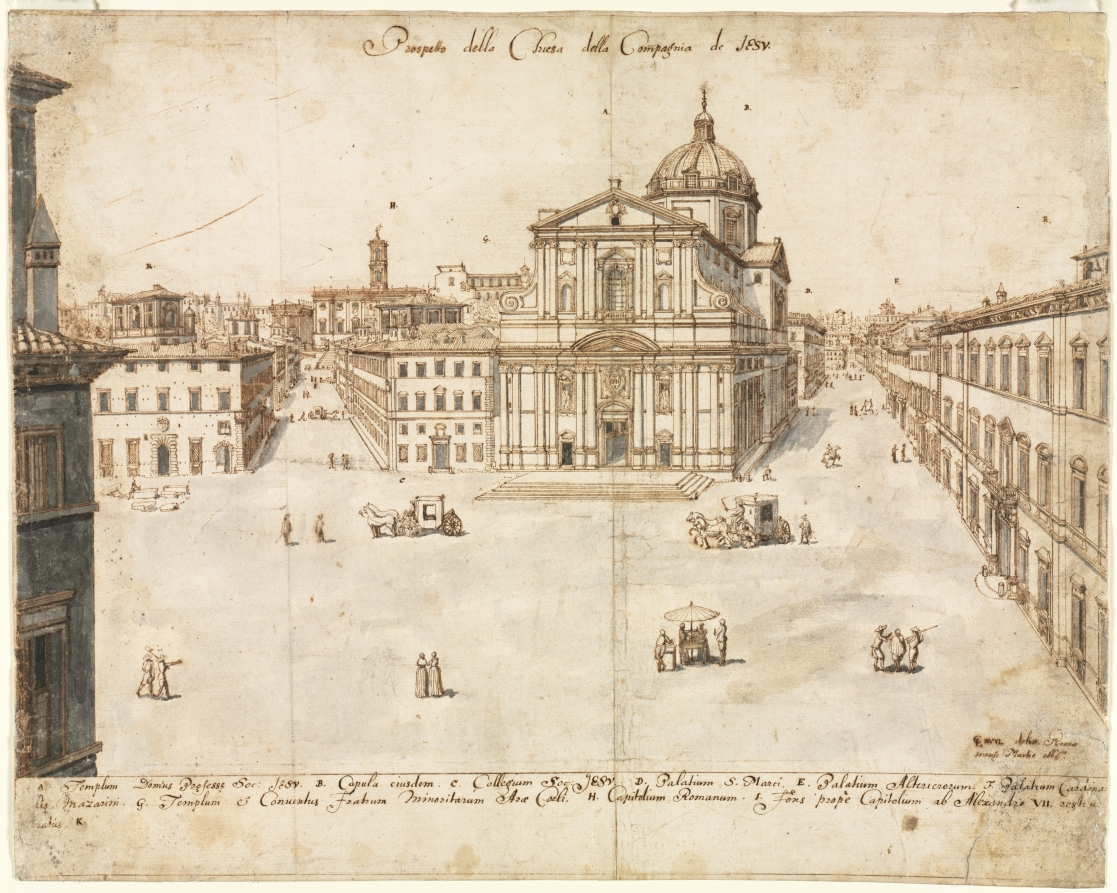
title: Eighteen Views of Rome: The Church of the Gesù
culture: Flanders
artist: Lievin Cruyl (Flemish, c. 1640-c. 1720)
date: 1665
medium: pen and brown ink and brush and gray wash over graphite; framing lines in brown ink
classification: Drawing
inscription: signed, lower right, in brown ink: [artist's monogram: LC] RVYL delin. Romæ / mense Martio 1665. ; by artist, upper center, in brown ink: Prospetto della Chiesa della Compagnia di JESU. ; by artist, throughout composition, in brown ink: [the letters A-H] ; by artist, across bottom, in brown ink: A. Templum Domus Professæ Soc: JESU. B. Cupula eiusdem. C. Collegium Soc: JESU. D. Palatium S. Marci. E. Palatium Alterierorum. F. Palatium Cardina= / lis Mazarini. G. Templum et Conventus Fratrum Minoritarum Aræ Coeli. H. Capitolium Romanum. I. Fons propè Capitolium ab Alexandro VII. restau= / ratus. K. ; ON STRIPS OF PAPER MOUNTED TO VERSO, lower center, in graphite: A20981 ; lower right, in graphite: E. 18